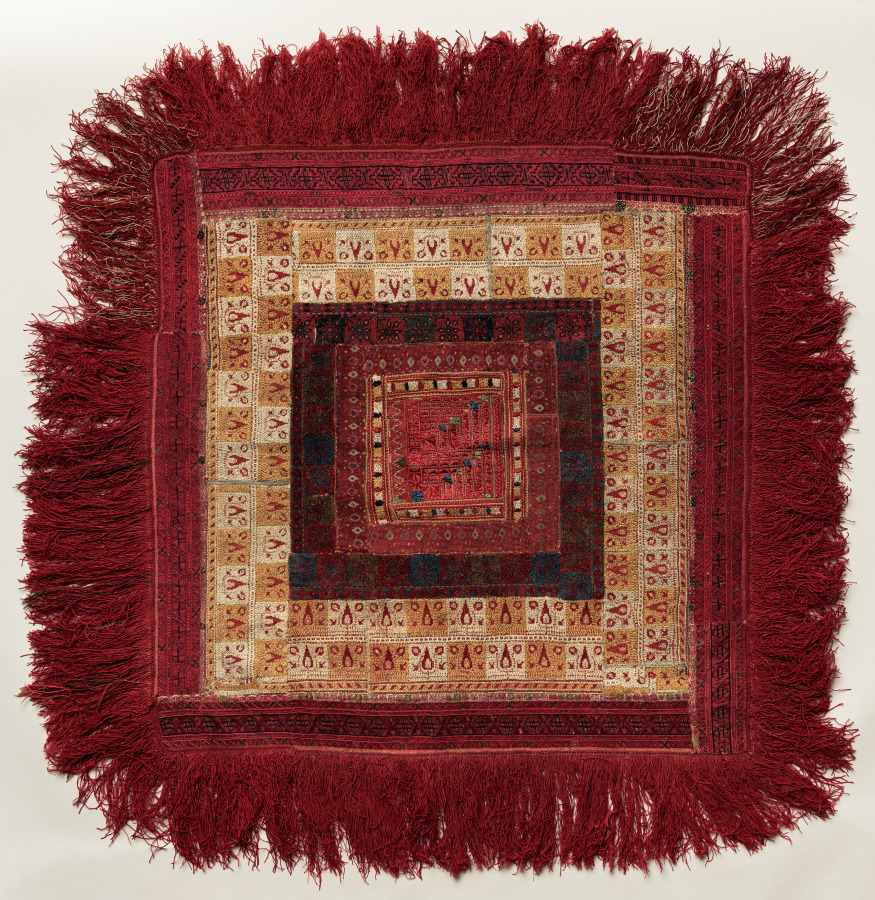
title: Composite textile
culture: Probably Greece or Macedonia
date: 1800s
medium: Silk, dye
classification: Embroidery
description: This large square textile is a composite, assembled from several different woven and embroidered panels and finished with a long thick fringe. These silk-embroidered pieces might have been parts of old clothing or other textiles. Stylistic assessment connects it to Greek and Macedonian traditions; such objects were made in the eastern Mediterranean for the tourist market.